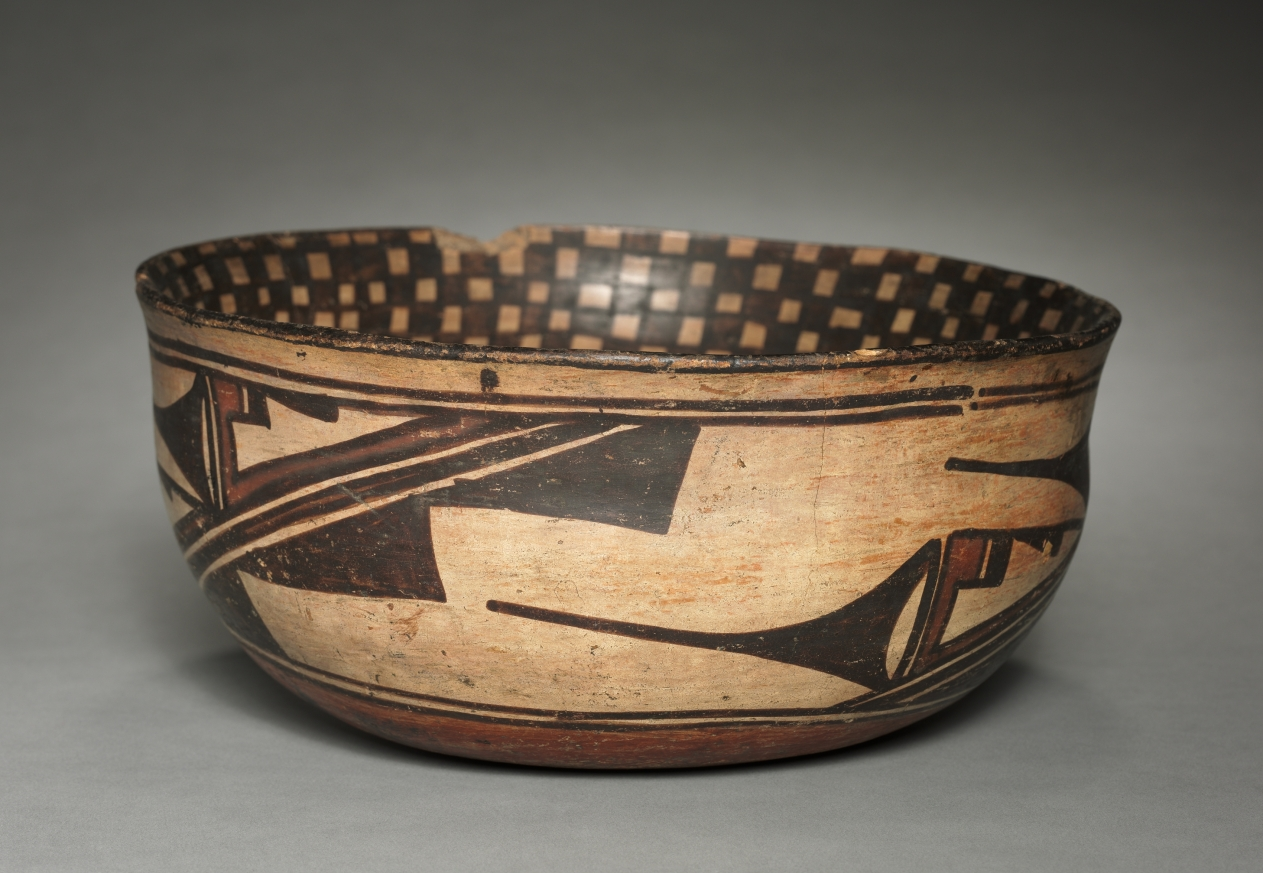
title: Stew Bowl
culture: Southwest,Pueblo, Hopi, Post-Contact Period, 20th century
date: 1870– 1880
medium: ceramic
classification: Ceramic